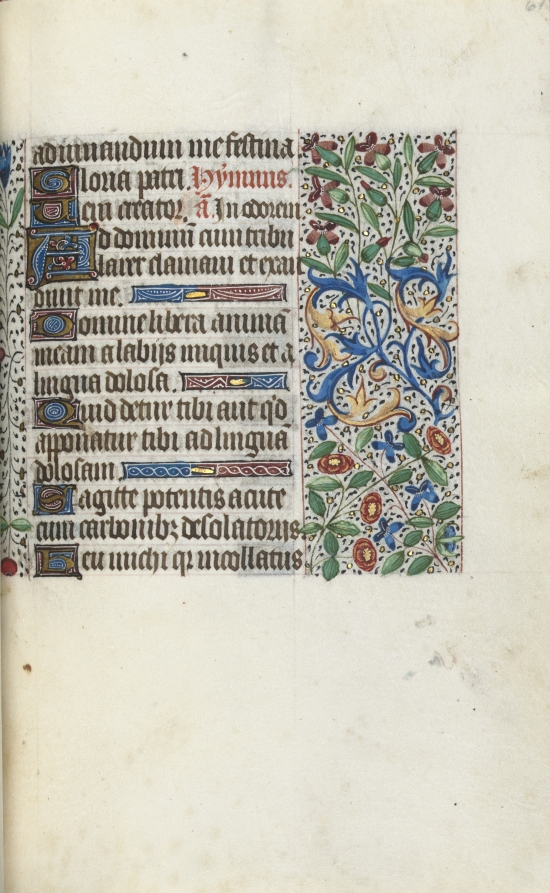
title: Book of Hours (Use of Rouen): fol. 61r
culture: France, Rouen, 15th century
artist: Master of the Geneva Latini (French, active Rouen, 1460–80)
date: c. 1470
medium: ink, tempera, and gold on vellum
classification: Bound Volume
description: In the late 1400s and early 1500s Rouen was an established and important center of book production. The city’s cathedral had a wealthy chapter that spent large sums of money to commission books and to maintain its extensive library. The stationers and booksellers would have likely been concentrated in or near the cathedral precinct. This artist, named after a manuscript now in Geneva, was Rouen’s principal illuminator during the second half of the 1400s.